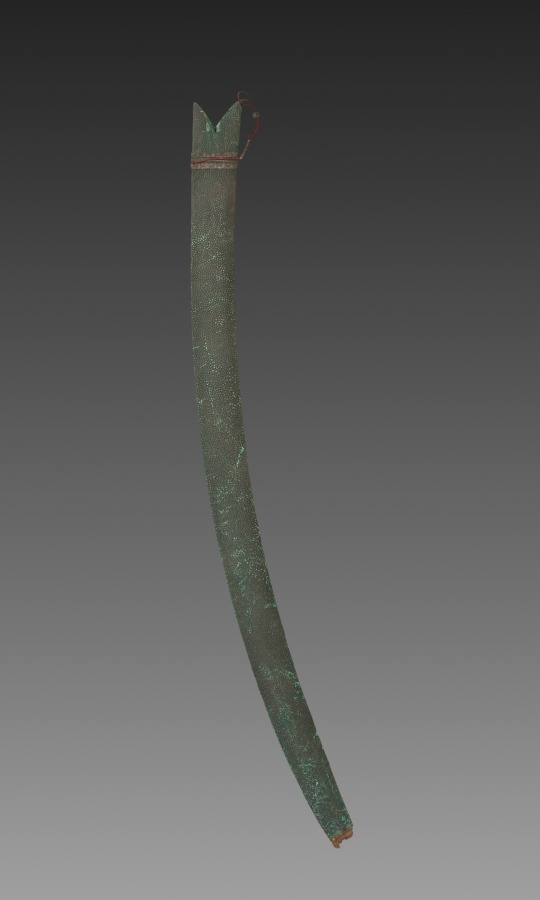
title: Silapa Sword (green leather case)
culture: India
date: 1700s–1800s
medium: Green leather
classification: Arms and Armor